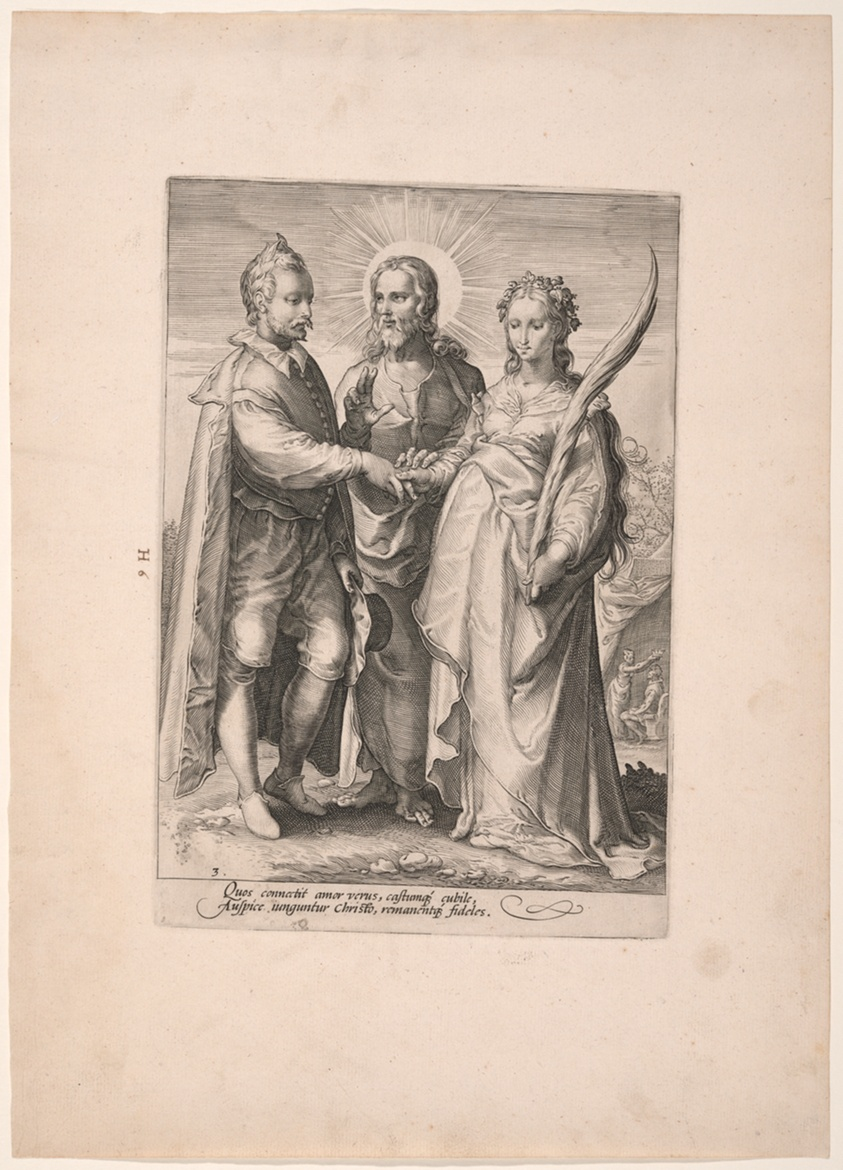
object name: Print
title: Marriage for Spiritual Love, from Three Kinds of Marriages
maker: Jan Saenredam (Flemish, 1565–1607); after Hendrick Goltzius (Dutch, 1558–1617)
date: c. 1595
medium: Engraving in black on cream laid paper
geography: Flanders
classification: prints and drawing; paper; print; engraving